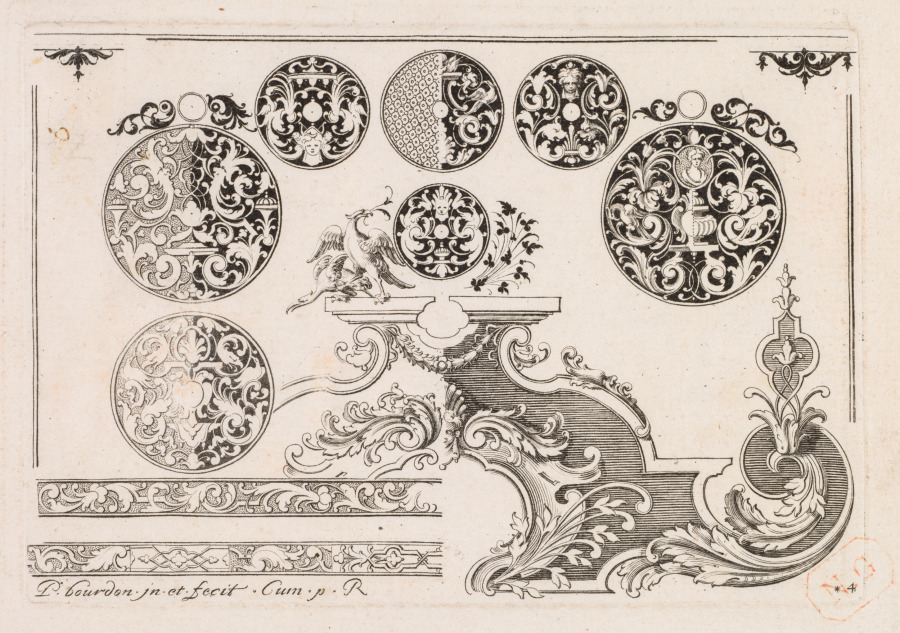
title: # 5 from " Livre second essais de gravjre " second book of Engraved Designs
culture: France, 18th century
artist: Pierre Bourdon (French)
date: c. 1703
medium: etching and engraving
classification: Print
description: The title page for this set of prints suggests that Bourdon’s designs are “useful for clockmakers, goldsmiths, chiselers, engravers and other people.” These craftsmen who made ornamented objects, such as the boxes and pistol below, sometimes consulted printed designs for inspiration. However, pattern prints similar to Bourdon’s also catered to aristocrats and wealthy professionals who pursued knowledge about styles and artists as a form of entertainment.